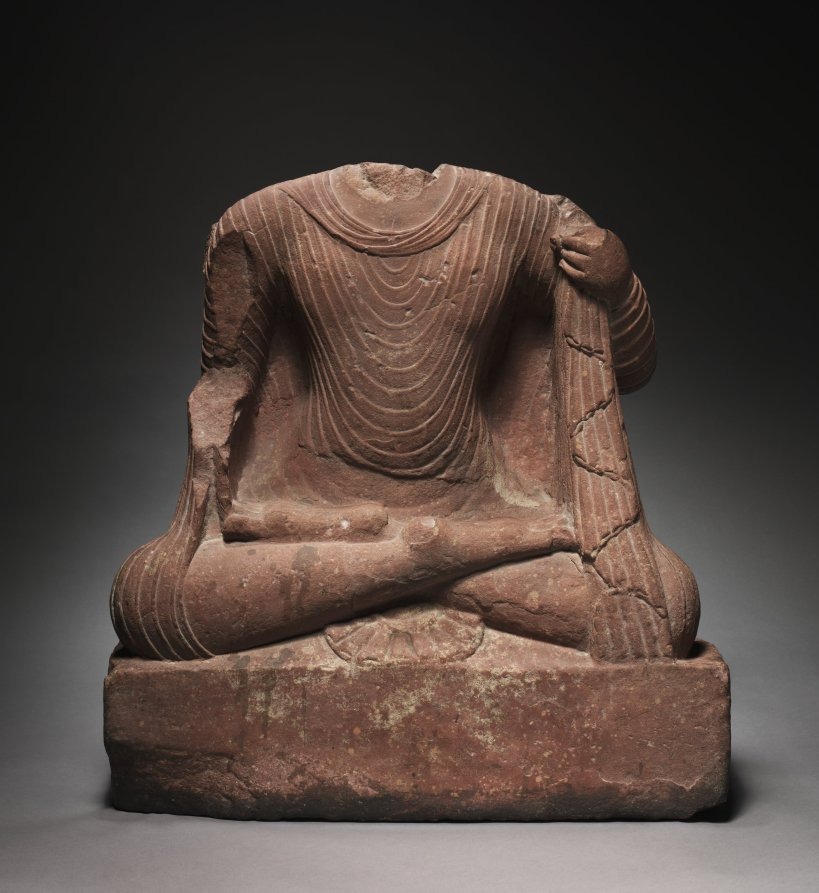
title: Seated Buddha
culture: Northern India, Mathura, Kushan period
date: 200s CE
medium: sandstone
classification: Sculpture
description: Artists in the north Indian city of Mathura reinterpreted the appearance of the Greco-Roman style of drapery, which was popular in the region of Gandhara, in present-day Pakistan. They preferred a more otherworldly, abstracted rendition of the folds, giving the Buddha a powerful, superhuman energy.